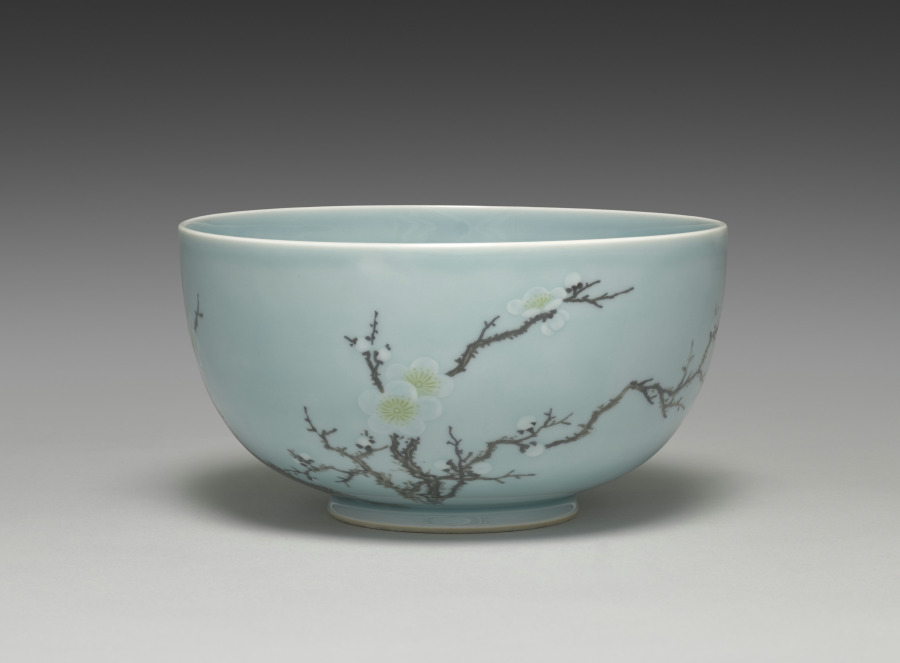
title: Sweets Bowl with Plum Tree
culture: Japan, Taishō period (1912–26) to Shōwa period (1926–89)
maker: Seifū Yohei IV (Japanese, 1872–1951)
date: 1914–46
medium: Porcelain with underglaze color and modeled design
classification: Ceramic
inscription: 清風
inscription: 清風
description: In Chinese culture, the plum symbolizes the virtue of perseverance. For his sweets bowl based on Qing dynasty (1644–1911) Chinese prototypes, Seifū Yohei IV first painted the gnarled boughs of a plum tree in iron oxide on the surface. Then he made the tree’s blossoms slightly raised by building up slip, or liquified clay. He painted their centers yellow. Before applying the blue glaze, he covered the blossoms with paper so that they remained white.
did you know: Broad access to high-quality Chinese ceramics occasioned by the collapse of the Qing dynasty (1644–1911) and the dispersal of elite Chinese collections presented Seifū Yohei IV with models for both molded decoration and painted motifs.